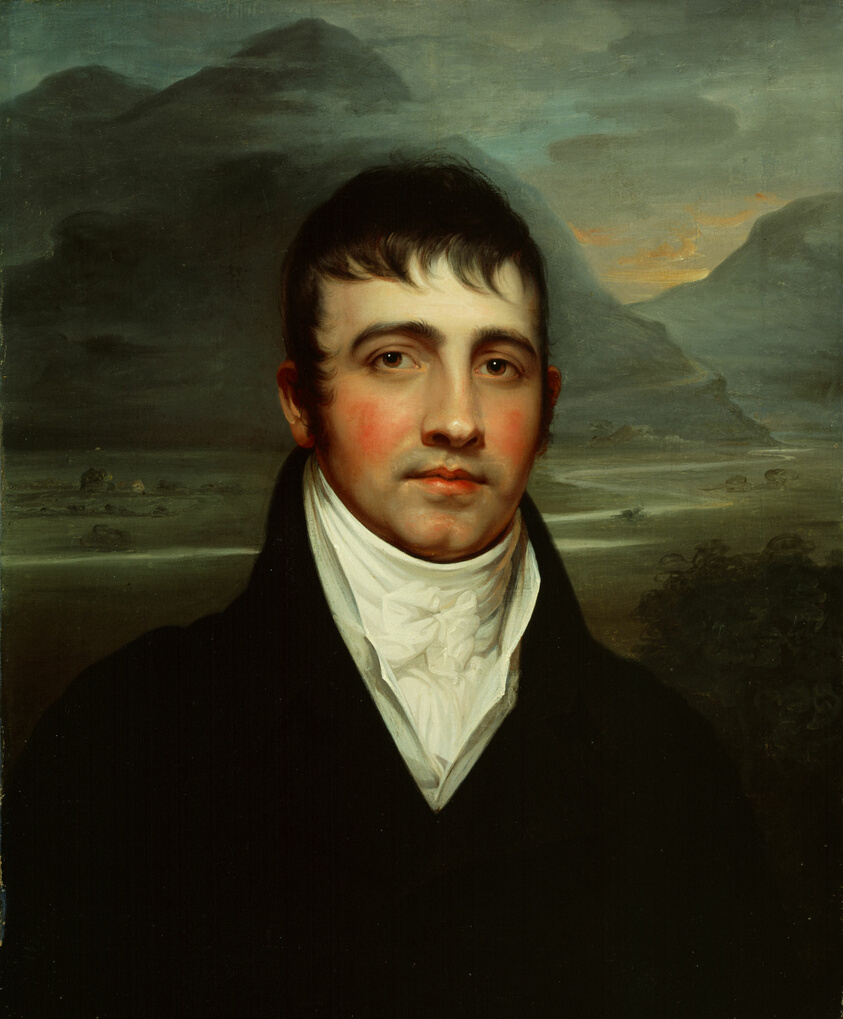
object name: Painting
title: Samuel Fisher Bradford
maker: Rembrandt Peale (American, 1778–1860)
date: 1803–8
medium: Oil on canvas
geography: Philadelphia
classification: painting; american arts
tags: fashion, people, portraits